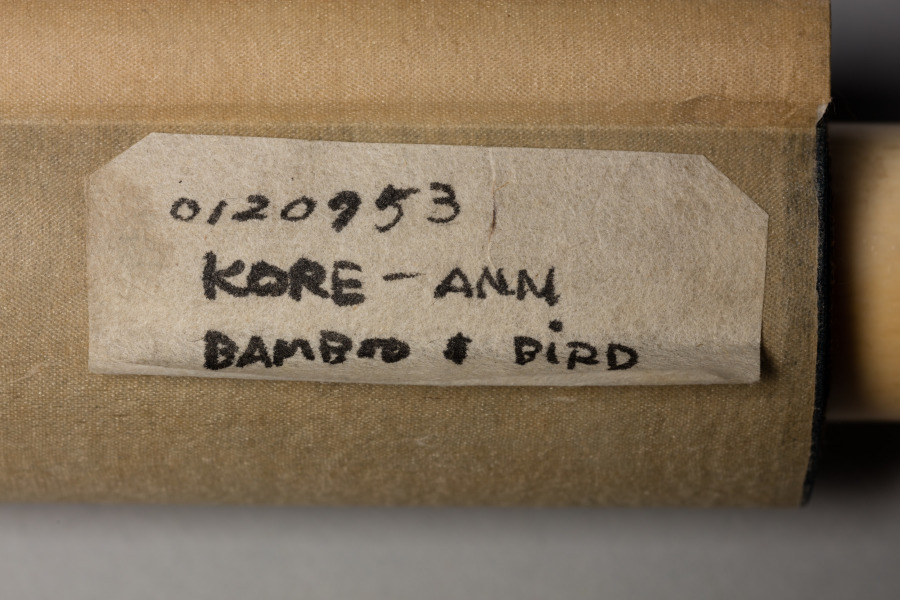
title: Sparrows and Bamboo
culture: Japan, Muromachi period (1392–1573)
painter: Shiken Saidō (Japanese, 1486–1581)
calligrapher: calligraphy by Ekkei Reikaku (Japanese, d. 1609)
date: mid- to late 1500s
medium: hanging scroll; ink on paper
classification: Painting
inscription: signed: Ekkei Reikaku daishi owaru inscription sealed: Reikaku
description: Shiken Saidō, whose style name was Ze'an, was a Zen monk who trained at Shōkokuji temple in Kyoto, and designed the garden of Reiun’in at Myōshinji temple. He painted landscapes in the style of painter and art advisor to the shogun, Sōami (died 1525), as well as bird-and-flower compositions. A poetic inscription by the monk Ekkei Reikaku accompanies this gentle composition of two sparrows perched on bamboo.